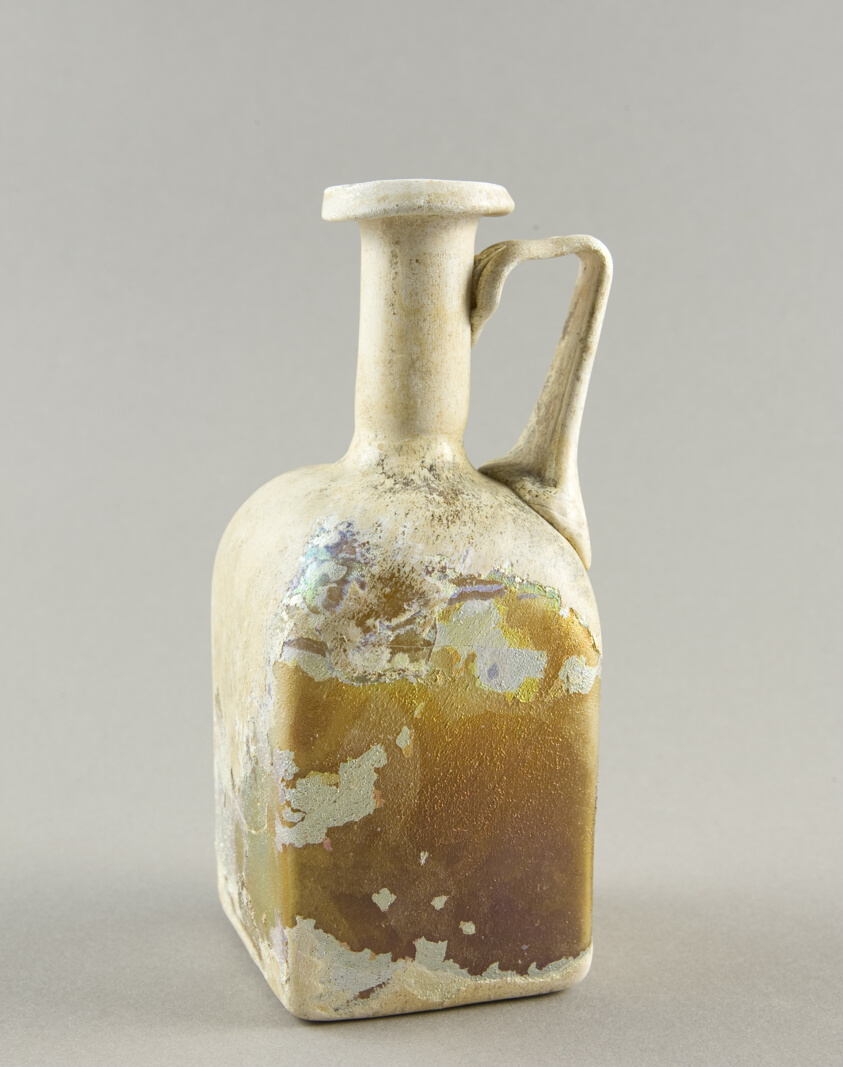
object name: Vessel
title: Pitcher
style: syrian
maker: Roman; Eastern Mediterranean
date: 2nd-3rd century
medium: Glass, blown technique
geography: Syria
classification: glass; vessel; ancient art